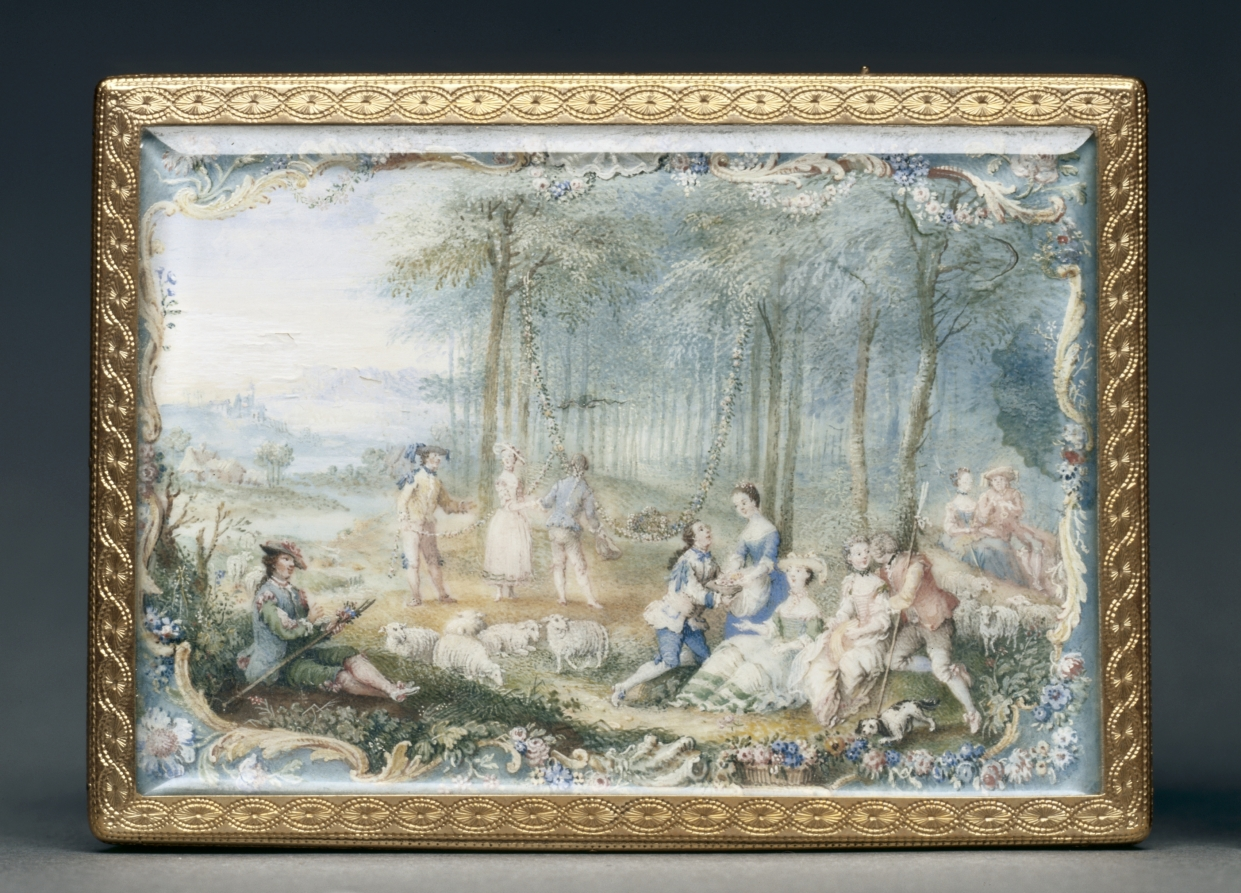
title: Snuff Box (Tabatière)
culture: France, 18th century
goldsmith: Jean Ducrollay (French, 1709–1787)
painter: Louis Nicolas van Blarenberghe (French, 1716–1794)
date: 1753–54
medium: gold and glass with miniatures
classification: Metalwork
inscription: [Maker's mark of Jean Ducrollay, master goldsmith in 1734, inside cover; bottom; right side]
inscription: [Charge mark of Julien Berthe, Paris, 1750-1756, inside cover; bottom; right side]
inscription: [Discharge mark of Julien Berthe, Paris, 1750-1756, on bezel]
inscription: [Inscribed on miniature, front side]: "V.[an] Blarenberghe/1753"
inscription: [Warden's mark for Paris, 1763-1754, inside cover; bottom; right side]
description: In 18th-century France ornately enameled boxes that held snuff—powdered tobacco—became a popular accessory in the French court. This object’s rectangular shape differs from early work attributed to Jean Ducrollay. Though the light colors, floral borders, and depictions of lively outdoor recreation are representative of earlier rococo imagery, the rectangular shape and simple frieze make it a primary example of rising neoclassicism.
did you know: The Ducrollay family was one of the most sought-after Parisian goldsmith workshops under the reign of French King Louis XV.